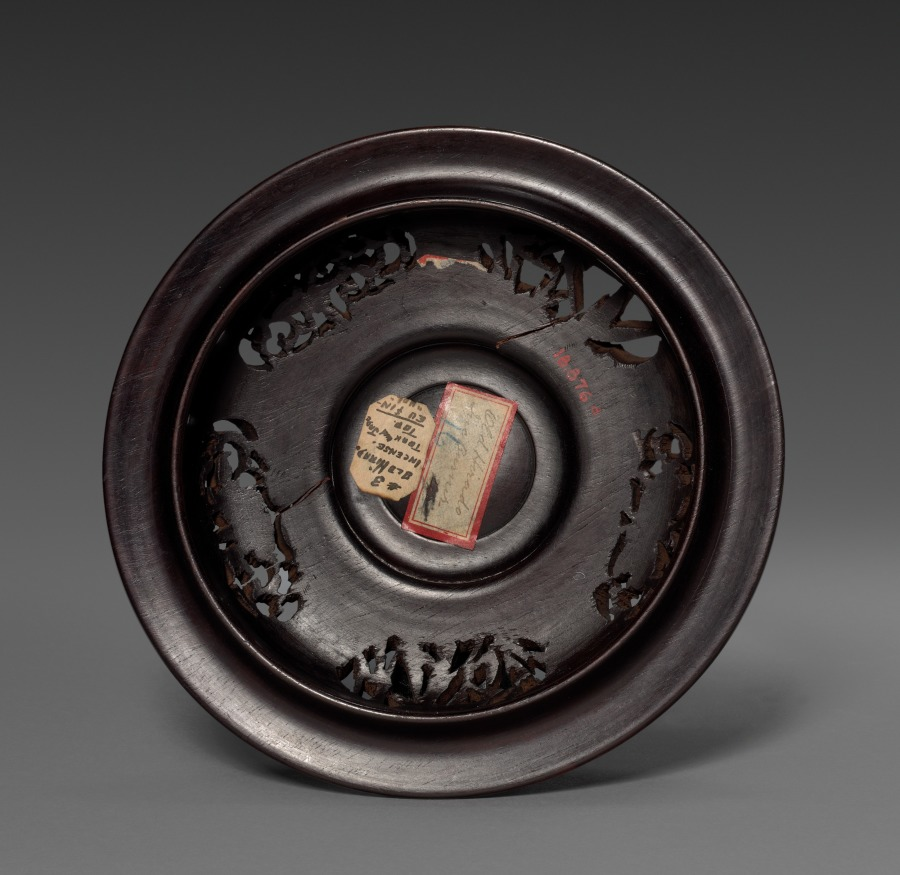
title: Jar ( lid)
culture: Japan, Edo period (1615–1868)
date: early to mid-1800s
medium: teak and carved stone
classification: Ceramic